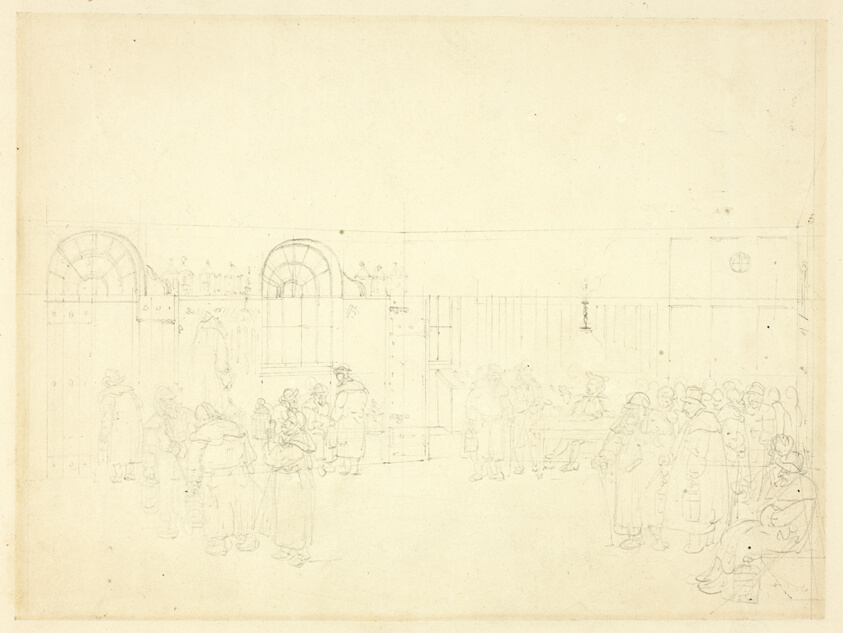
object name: Drawing and Watercolor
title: Study for Watch House, St. Mary Le Bone, from Microcosm of London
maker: Augustus Charles Pugin (English, born France, 1762-1832); Thomas Rowlandson (English, 1756-1827)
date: c. 1809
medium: Graphite on cream wove paper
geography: England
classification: graphite; drawings (visual works); prints and drawing